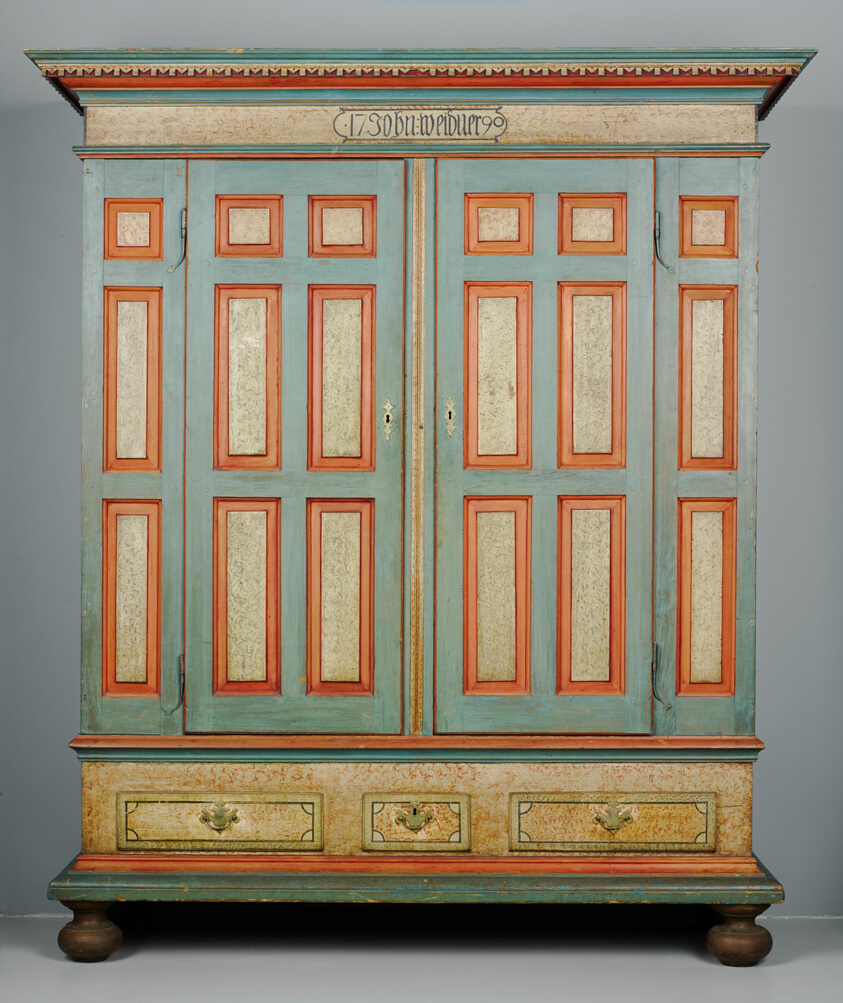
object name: Furniture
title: Schrank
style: Folk Art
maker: Artist unknown (American, 18th century); Berks County, Pennsylvania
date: c. 1790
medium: Painted tulipwood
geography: Berks County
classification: case furniture; furniture; american decorative arts; american arts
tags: furniture